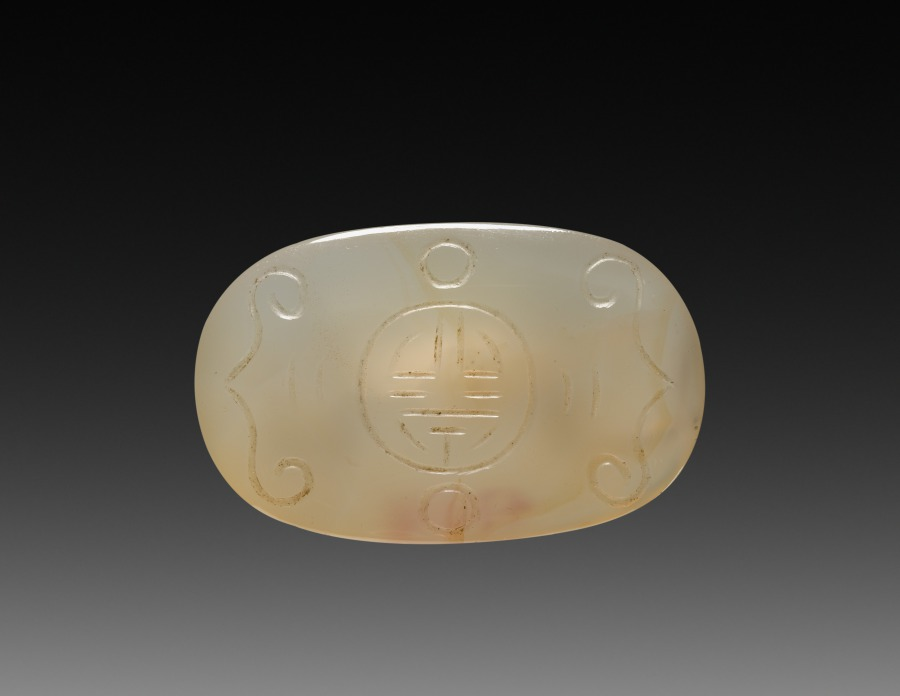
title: Buckle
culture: China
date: 1900s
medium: agate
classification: Jewelry